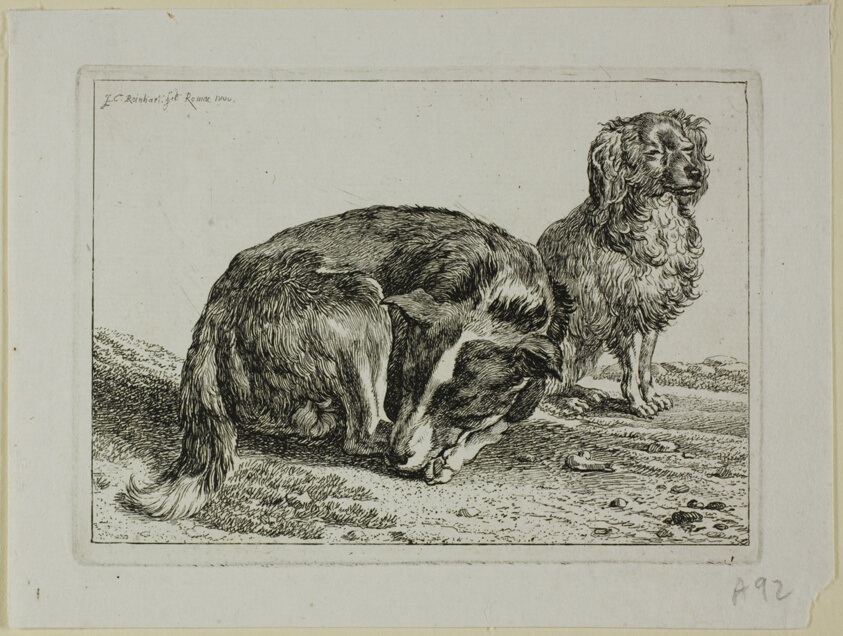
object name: Print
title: Two Dogs Resting, from Die Zweite Thierfolge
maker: Johann Christian Reinhart (German, 1761-1847)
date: 1800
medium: Etching on ivory laid paper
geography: Germany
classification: etching; print; prints and drawing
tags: dogs, animals